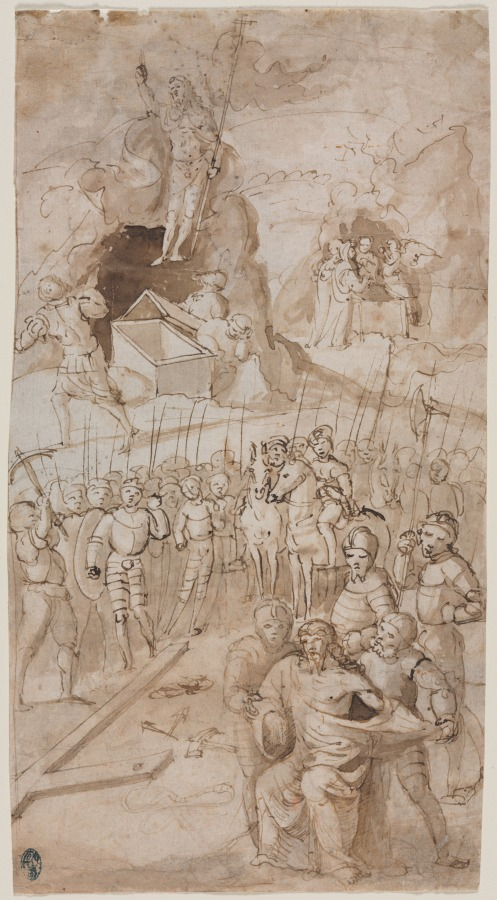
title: Three Scenes from the Passion of Christ (recto); Architectural Sketch (verso)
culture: Northern Italy, 16th century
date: 1500s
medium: pen and brown ink and brush and brown wash over traces of black chalk; framing line (left edge) in brown ink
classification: Drawing